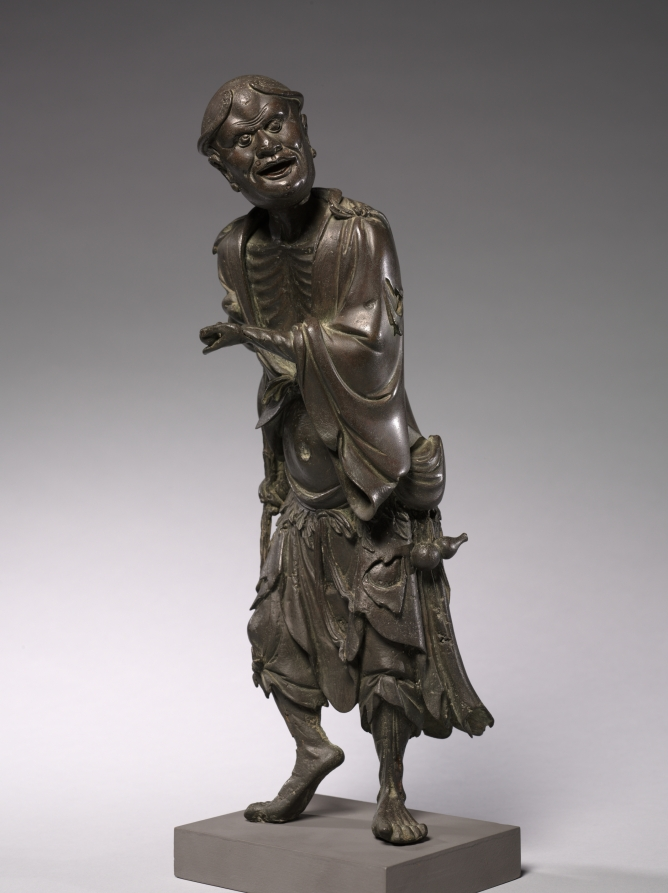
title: The Immortal Li Tieguai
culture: China, Ming dynasty (1368–1644)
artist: Su Wennan (Chinese)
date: 1500s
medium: bronze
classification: Sculpture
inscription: 蘇文南製 (Su Wennan Zhi )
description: This bronze statue of Li Tieguai shows him dressed as a beggar in a tattered robe, holding a crutch in his right and a ball of medicine in his left hand. Li Tieguai is the patron saint for physicians and legend says that he dispenses pills from the gourd for the sick. He wears a belt of leaves and another gourd hangs from his waist. His head is crowned with what appears to be a metal ring, signifying his immortal status. Four incised characters in seal script on the back of the figure reads “made by Su Wennan (蘇文南製).”